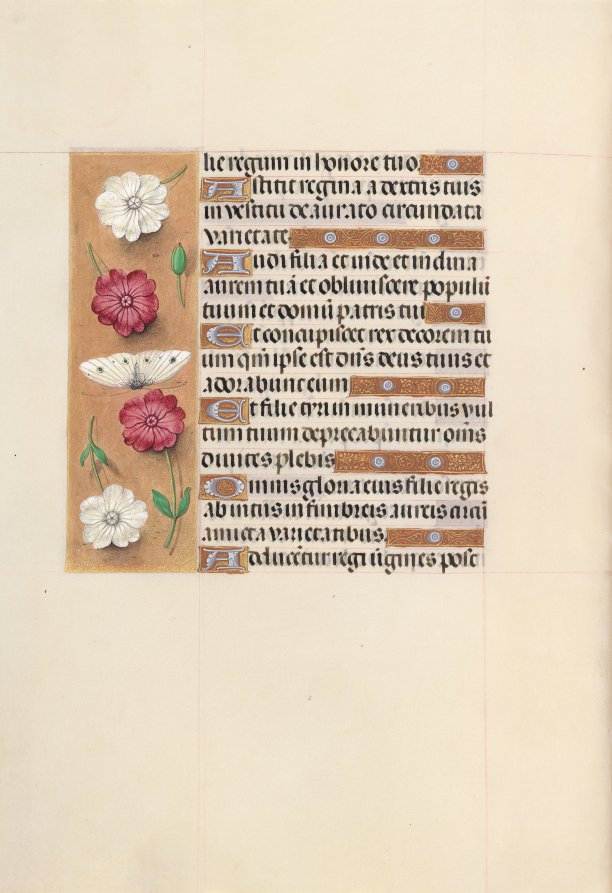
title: Hours of Queen Isabella the Catholic, Queen of Spain: Fol. 104v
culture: Flanders, Ghent and Bruges, late 15th century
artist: Master of the First Prayerbook of Maximillian (Flemish, c. 1444–1519)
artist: and Associates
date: c. 1500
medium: ink, tempera, and gold on vellum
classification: Bound Volume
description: This manuscript was illuminated by a circle of at least five highly organized manuscript painters active in the Flemish cities of Ghent and Bruges. The principal illuminator was Alexander Bening, who painted the majority of the book's miniatures. Manuscripts produced by this circle of artists are renowned for the decoration of their borders, which typically feature a rich variety of realistically-painted flowers, birds, and butterflies. This prayer book, called a book of hours, was intended not for a cleric, but for the private devotions of a lay person-in this case, Isabella the Catholic, Queen of Spain (1451-1504). Isabella's coat of arms embellishes the book's frontispiece. It is unlikely that the book was commissioned by the Queen herself; rather, she probably received it as a diplomatic gift from someone courting her patronage, perhaps Cardinal Francisco Jimenez de Cisneros. A Franciscan friar, Jimenez was dependent upon Isabella for his advancement, first to the post of Queen's confessor in 1492, and then to Archbishop of Toledo in 1495.